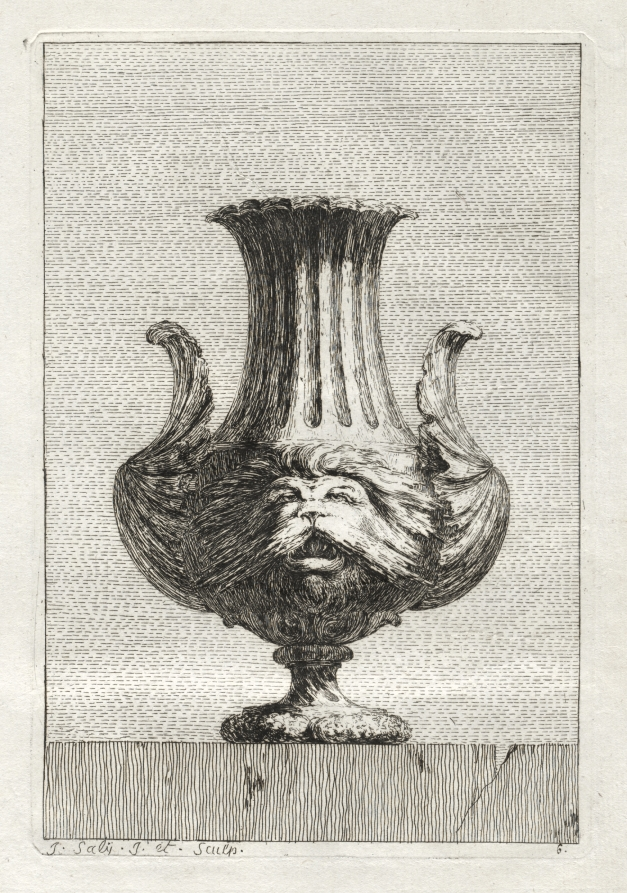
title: Suite of Vases: Plate 6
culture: France, 18th century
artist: Jacques François Saly (French, 1717–1776)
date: 1746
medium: etching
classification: Print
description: Trained as a sculptor, Saly etched a series of 30 vase designs while studying at the Académie de France in Rome. After his return to Paris, the publication announcement for the Suite of Vases endorsed the prints as an indication of the sculptor’s ingenuity and freedom of design. The vase designs also nourished an appetite for the revival of classical elements, or Neoclassicism, in decorative arts that developed in the mid-18th century.